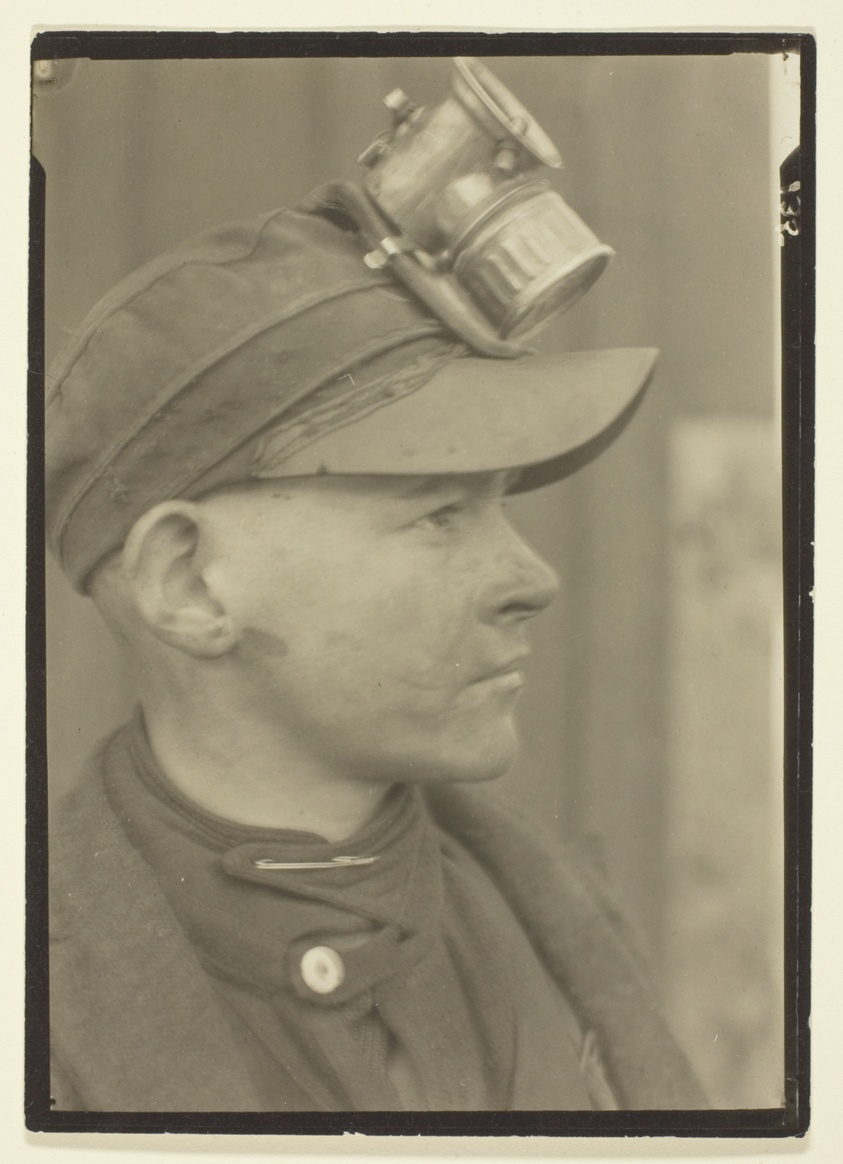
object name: Photograph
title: Breaker Boy in Pennsylvania Coal Mine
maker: Lewis Wickes Hine (American, 1874–1940)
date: 1915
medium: Gelatin silver print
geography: United States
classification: gelatin silver (developing-out-paper) pr; photographic process; photography; photograph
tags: Collected by Hugh Edwards